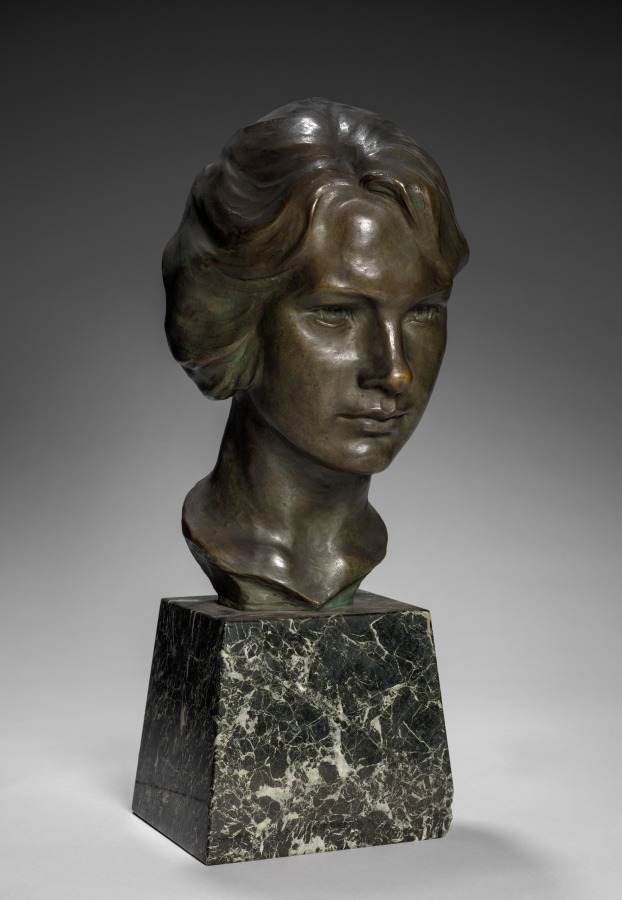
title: Head of a Girl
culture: America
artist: Nancy Coonsman (American, 1888–1920)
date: c. 1920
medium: bronze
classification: Sculpture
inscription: signed back of neck: Nancy Coonsman © R.C. & N.M. Vose/Roman Bronze Works New York.